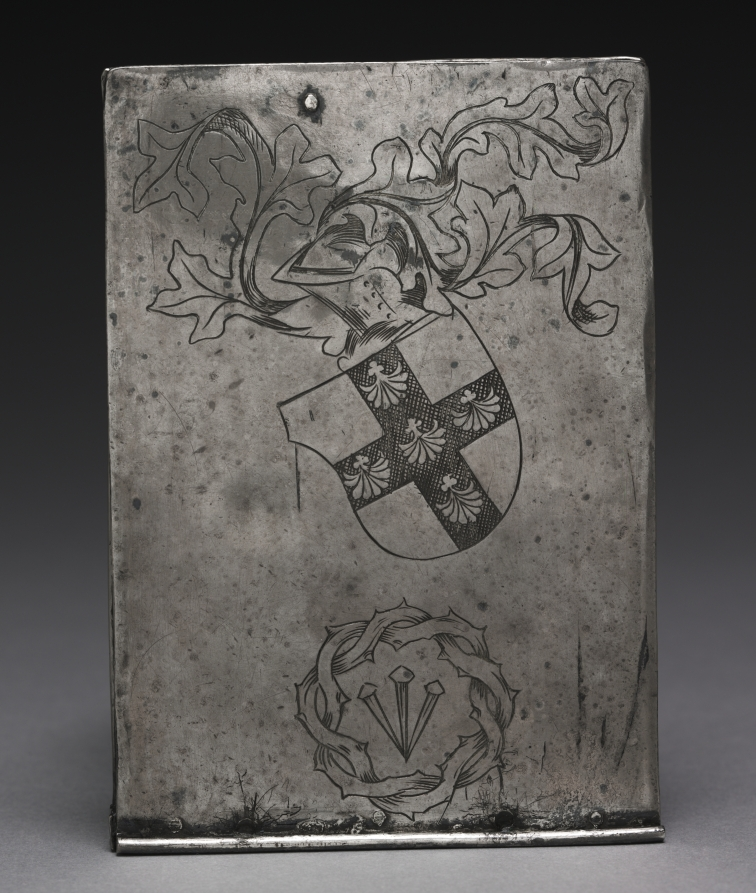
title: Plaque: Christ Carrying the Cross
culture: Germany, Lower Rhine, late 15th Century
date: c. 1480–1500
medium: ivory with traces of color and gold, mounted in silver frame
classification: Ivory